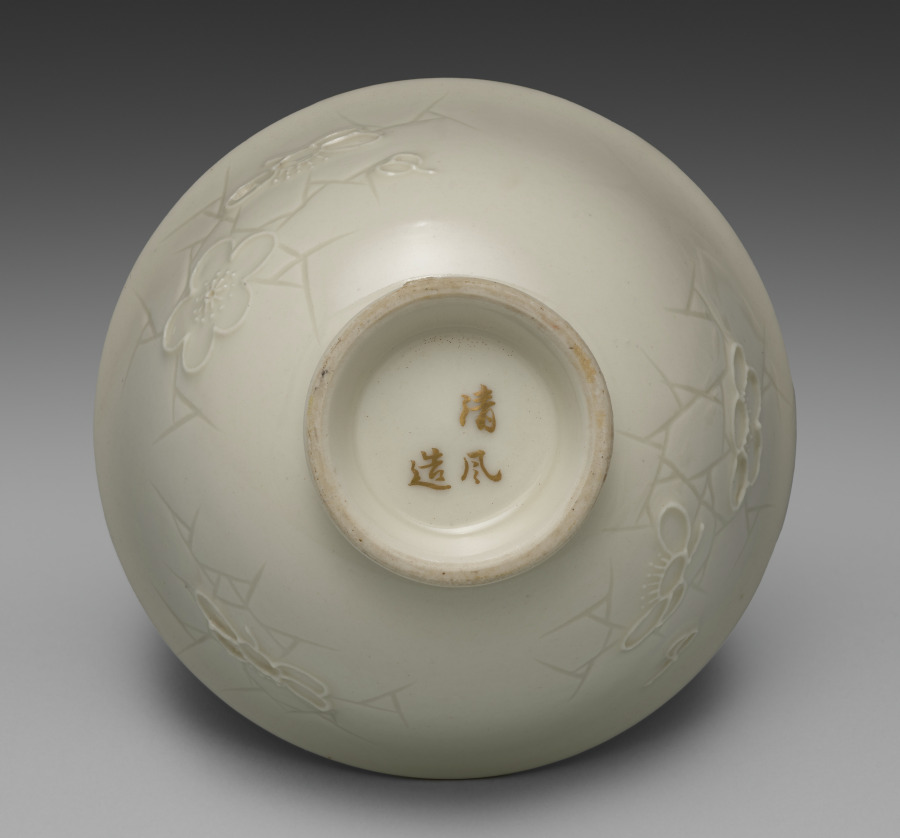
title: Bowl from Dining Set with Plum Blossoms and Cracked-Ice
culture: Japan, Meiji period (1868–1912)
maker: Seifū Yohei II (Japanese, 1844–1878)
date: c. 1875–78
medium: Porcelain with molded designs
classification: Ceramic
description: Each item in this set has a delicate low-relief design of flowering plum branches over scattered, intersecting lines meant to resemble the cracked-ice surface of a frozen body of water and is signed on the base in gold pigment. While Yohei II produced many fine works in underglaze blue, like those produced by Kiyomizu Shichibei, he also made works in quite different styles later in his career, from the early 1870 s. In 1873, he was appointed purveyor to the Industrial Center of Kyoto Prefecture, a designation associated with Kyoto’s efforts to reach an international market through the port of Kobe; and from 1875 until his death, he was involved in national-level projects to present Japanese ceramics across the world. It was during this period that Yohei III was apprenticed to Yohei II, and it has been suggested that this set may in fact be an early example of Yohei III’s work, which he signed with his teacher’s name. Decorated with flowers resembling Japanese textile motifs, the set calls to mind the design of Yohei II’s pair of vases with plum blossoms in the Victoria and Albert Museum. Here, the elaborate trees created for a formal public exhibition setting have been translated into the approachable blossoms of the genteel domestic environment. While the designs are consistent across the pieces, each raised flower petal and pistil and each incised line in the ice was done by hand, so the cups, bowls, and dishes are similar yet unique. The bottoms of two boxes once identified the set’s owner, but the information has been deliberately obscured with black ink. However, inscriptions still visible appear to indicate two occasions, once at the end of July 1886 , and once again in June 1916 , when parts of the set were requested from Hokura in Niigata Prefecture. The location corresponds to a neighborhood in the present-day city of Jōetsu. The surname Tsuji 辻 also appears on a paper tag affixed to one of the box cloths. Future research may possibly reveal more about their provenance. A vase by Yohei III in a private collection combines the formal grandeur of the Yohei II vases in the Victoria and Albert Museum with the gentler design of this dining set, placing flowering plum trees against soft, scalloped-edge clouds resembling those in golden screens.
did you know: The dining wares have a creamy white coloration that the four boxes containing them identify as Korean in style.